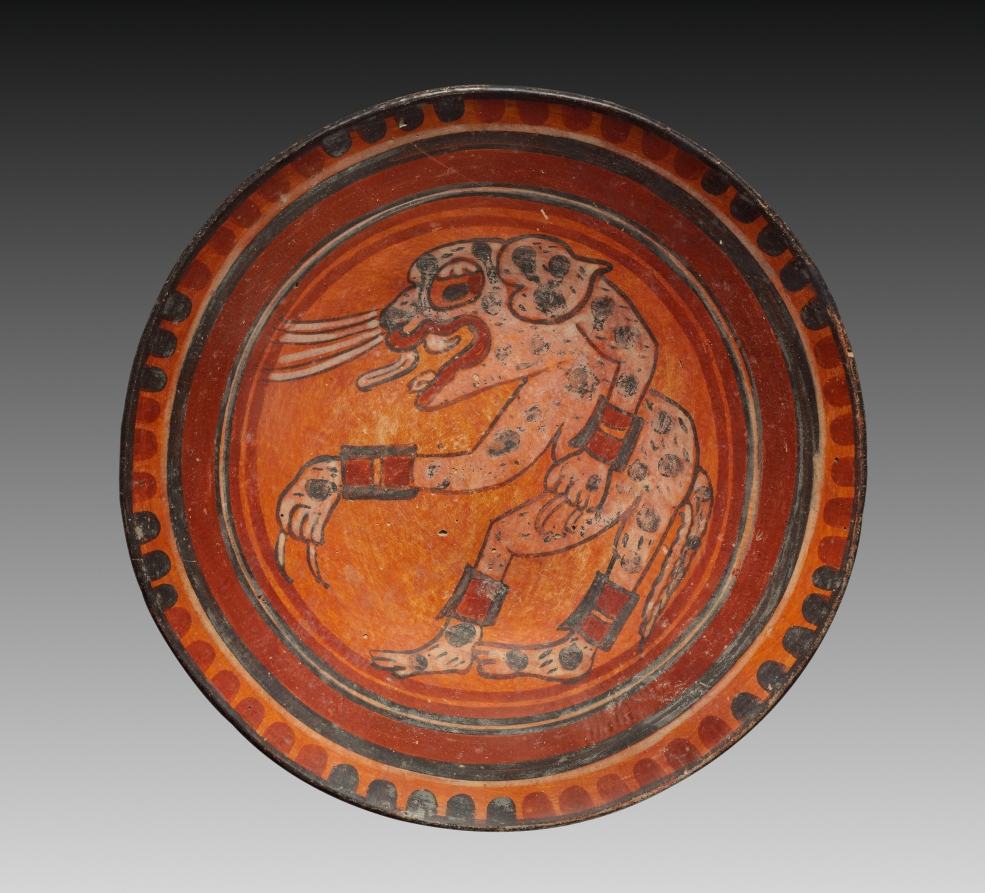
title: Plate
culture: Mexico, Campeche, Maya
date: c. 800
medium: earthenware with colored slips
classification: Ceramic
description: Its pose and jewelry suggest this flamboyantly painted figure may represent a human clad in the skin of a jaguar. Because the jaguar is the largest, most powerful predator in Mesoamerica, it was a natural metaphor for earthly and supernatural power alike.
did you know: Apex predators like jaguars are natural power metaphors.